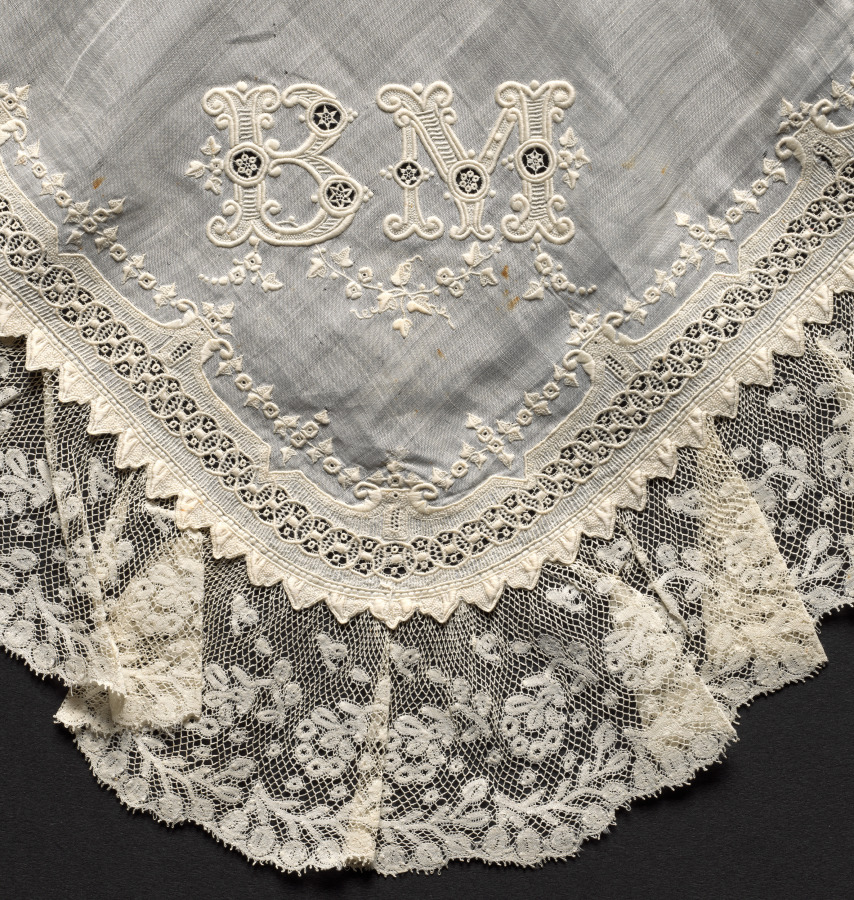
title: Lace Handkerchief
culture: Switzerland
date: 1850–1900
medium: linen: embroidery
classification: Embroidery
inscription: in one corner: "B.M."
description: This handkerchief has an embroidered monogram in one corner with the initials B. M.